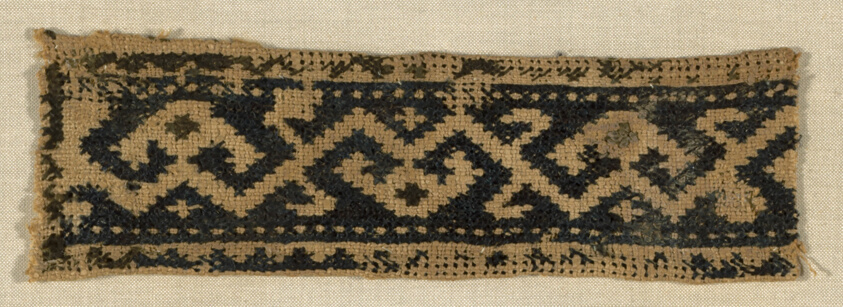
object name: Textile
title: Band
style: mamluk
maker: Egypt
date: Ayyubid period (1171–1250)/Mamluk period (1250–1517), 13th/14th century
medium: Linen, plain weave; embroidered with silk in cross and long-armed cross stitches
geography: Egypt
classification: textile; needlework (visual works)